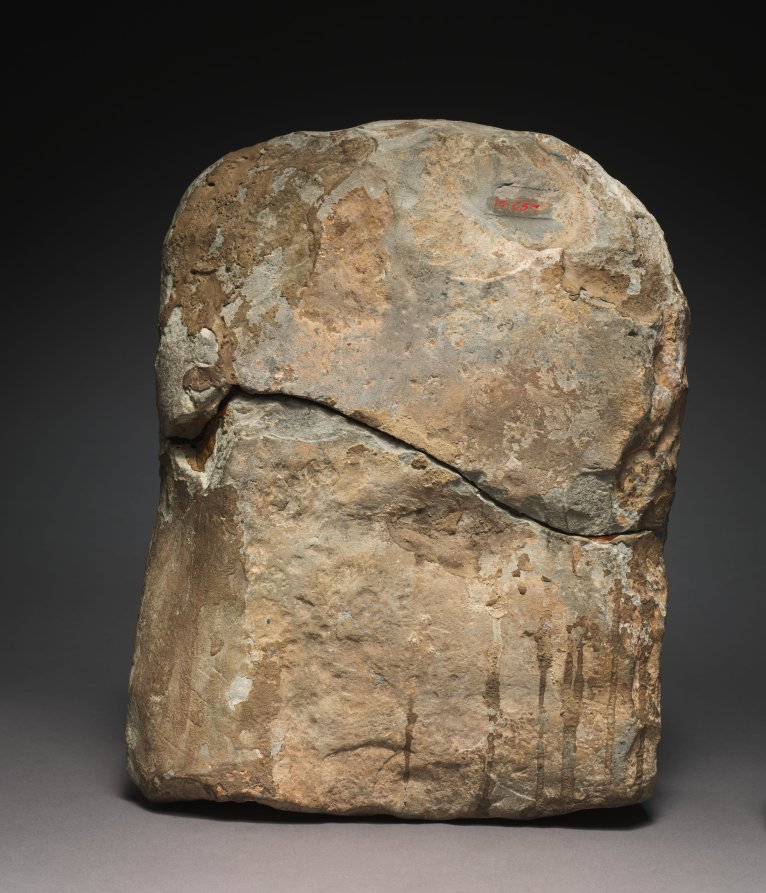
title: Stele of Userhat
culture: Egypt, Probably Thebes, New Kingdom, Dynasty 18, reign of Amenhotep III, 1391-1353 BC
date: 1391–1353 BCE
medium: limestone, originally painted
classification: Sculpture